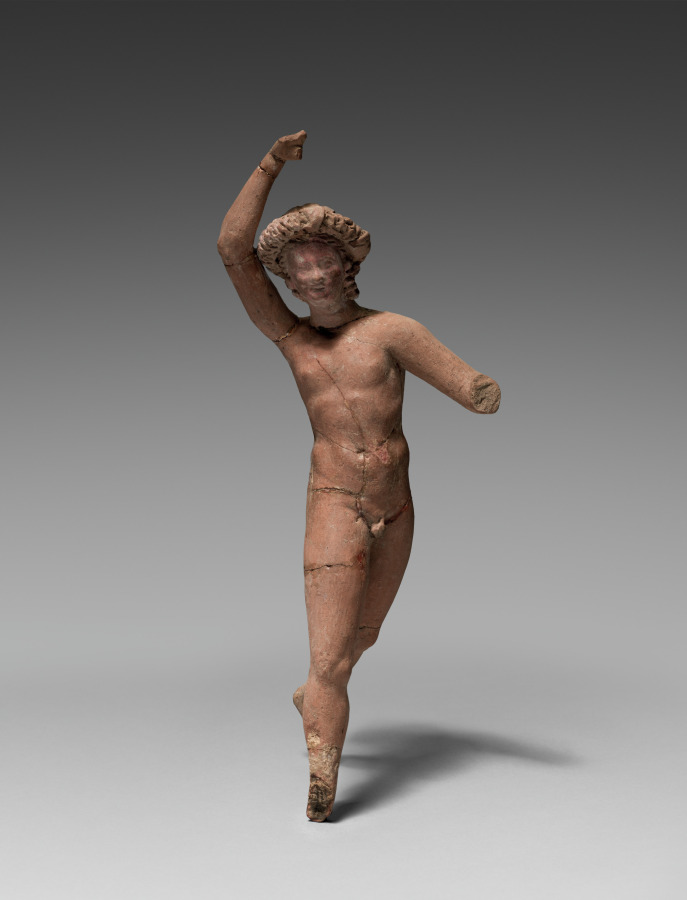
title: Dancing Eros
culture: Anatolia, Myrina, Greece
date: 300–200 BCE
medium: terracotta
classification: Sculpture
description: The region of Myrina in Asia Minor (now part of modern Turkey) is known for its abundance of ancient terracotta figurines. Eros, the Greek god of love, was especially popular. Here he is depicted as a nude youth, not a small child. Eros’ extra-long legs and arms, though only partially preserved, are thrown about in a carefree dance. He wears a celebratory floral crown atop his long curls. Once probably fully painted, only traces of red pigment survive on the face. A figurine like this one may have been a votive or offering of thanks to Eros or Aphrodite, his mother, also a goddess of love, for a successful marriage.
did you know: Figurines of Eros are often paired with figurines of his mythological wife, Psyche.